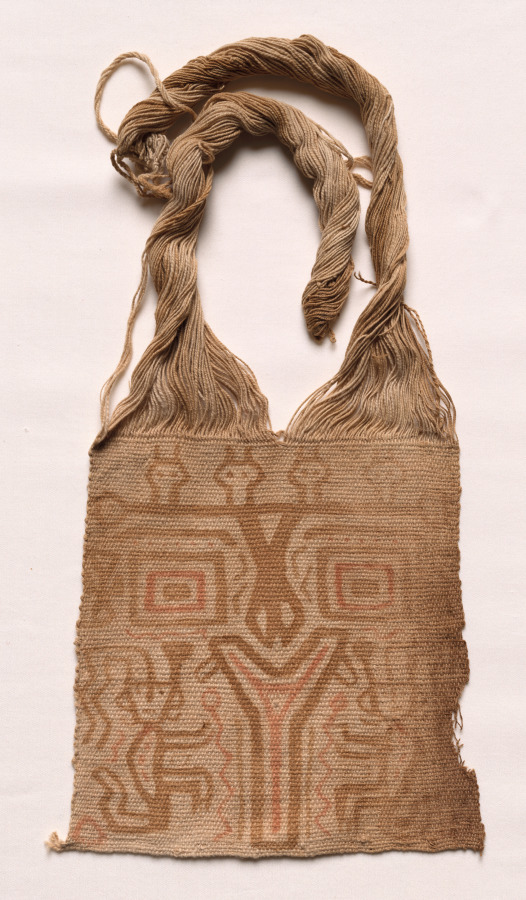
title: Mummy Bundle "Mask"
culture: Peru, South Coast, Ica Valley, Ocucaje site, Paracas style (700 BCE–1 CE)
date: 400–200 BCE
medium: Cotton and pigment; plain weave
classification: Textile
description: The Paracas people buried their dead in bundles that they created by carefully wrapping the seated human body in layers of garments and other textiles. In some cases, they placed a painted cloth—such as these examples—on the outer layer and at the top of the bundle. The hair-like yarns (unwoven warps) were arranged around a solid cotton disk that was sometimes wrapped with a headband. The cloths, then, seem to have functioned as the bundle’s head, even though some are painted not with faces but with complete figures whose supernatural character is marked by the appendages streaming from their bodies.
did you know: These masks fall into two categories, those with only a face and those with a full-bodied figure.